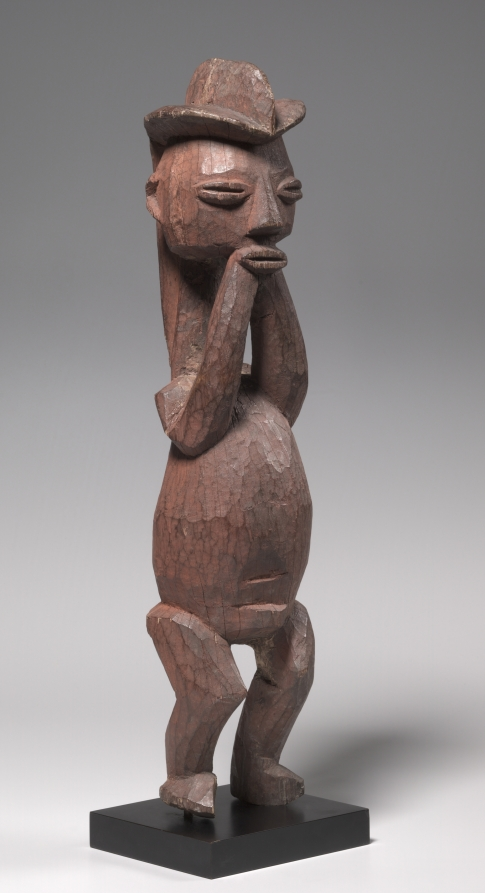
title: Male Figure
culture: Africa, Central Africa, Democratic Republic of Congo, Hungaan-style maker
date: mid- to late 1800s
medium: Wood and colorant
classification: Sculpture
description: Hungaan figures of this size served as guardians of ritual shrines and functioned in rituals to promote fertility, guarantee well-being, and ensure longevity. The striking crested hairstyle imitates a real coiffure or a wig, indicative of status and prestige. The hands supporting the chin identify the figure as a chief who is immersed in thought and contemplation, pondering over his responsibilities.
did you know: The red powdery surface of this figure mimics a red body adornment that mixed ground camwood with palm oil.